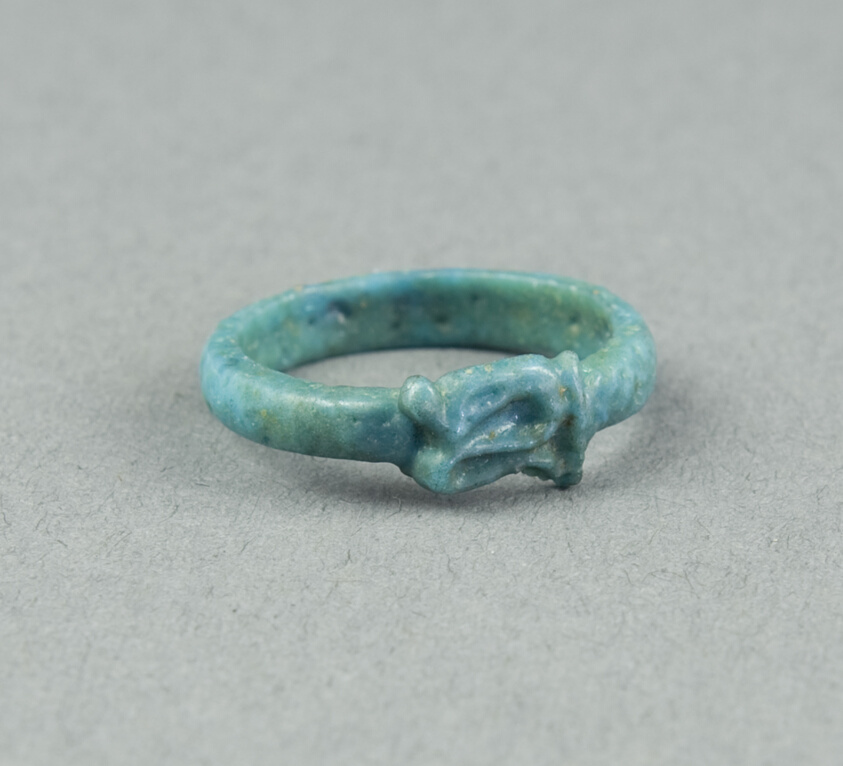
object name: Costume and Accessories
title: Ring: Figure of Serpent Uto (?)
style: egyptian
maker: Egyptian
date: New Kingdom, Dynasty 18 (about 1390 BCE)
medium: Faience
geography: Egypt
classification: ring (jewelry); ceramics; jewelry; ancient art; costume; faïence (composite material)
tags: goddesses